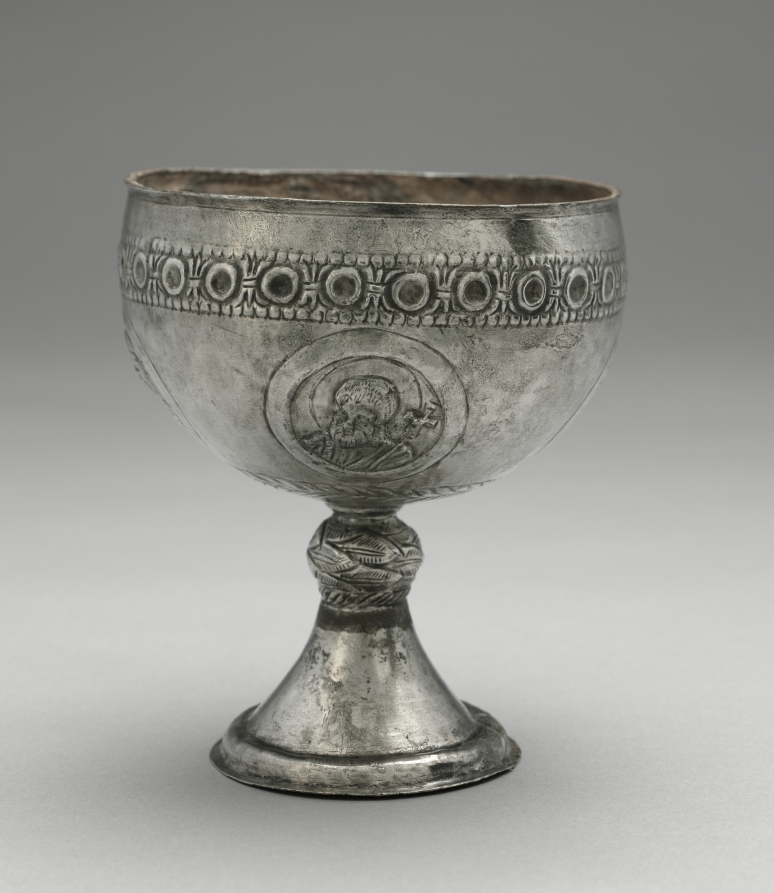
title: Chalice from the Beth Misona Treasure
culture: early Byzantium, Constantinople or Syria, Byzantine period, 6th-7th Century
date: c. 500–700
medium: silver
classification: Metalwork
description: These four liturgical silver vessels—a paten and three chalices (1950.378–81)—form what is now called the Beth Misona Treasure, named for the village in northern Syria for which the objects were made. While nothing is known about the exact location and circumstances of the treasure's discovery, the people of the village of Beth Misona were, like other Christian communities in Syria and Palestine, probably forced to bury their church silver to hide it from the Persians or Arabs, who conquered their lands in the first half of the 600s. The paten, which held pieces of Eucharistic bread used during Mass, is decorated with an engraved Latin cross surrounded by a dedicatory inscription that names the paten's donor—Domnos—and its original location, the church of Saint Sergios in Beth Misona. The chalices, which contained the Eucharistic wine used during Mass, feature broad cups decorated with portrait busts of Saints Peter and Paul, Christ, and the Virgin. One chalice bears a dedicatory inscription naming its donor—Kyriakos, Domnos's son—and the priest of the church that received the pious gift—Zeno.